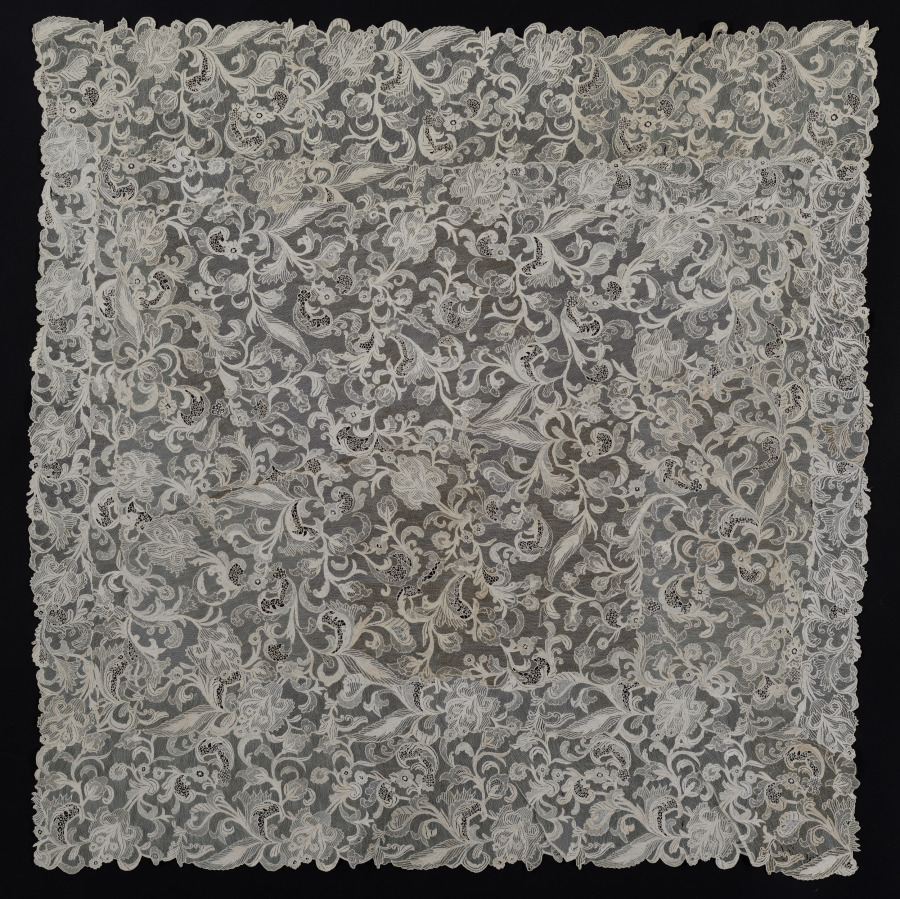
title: Lace Cloth or Square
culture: Italy, Burano(?), 1700s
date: 1700s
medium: Needle lace (Burano Point)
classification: Lace